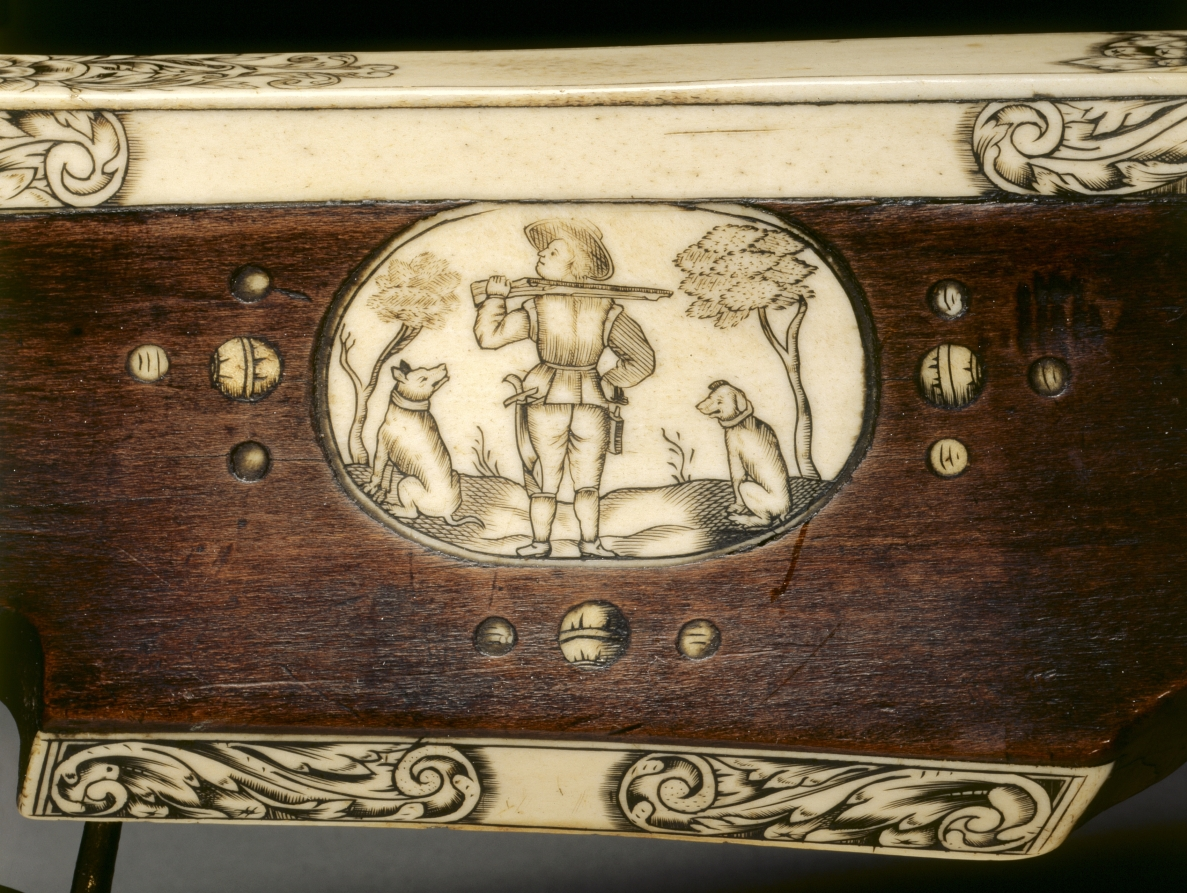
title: Pellet Crossbow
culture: Germany (?)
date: 1600s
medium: wood, inlaid with stag horn; flax cord; steel with traces of paint and gilding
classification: Arms and Armor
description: This ornate pellet crossbow is designed to fire molded clay pellets or small rocks, giving it the name stonebow. The bow is hand drawn and used for hunting small game.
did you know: This is a custom-made crossbow combining popular Italian and German designs of the 1600s.